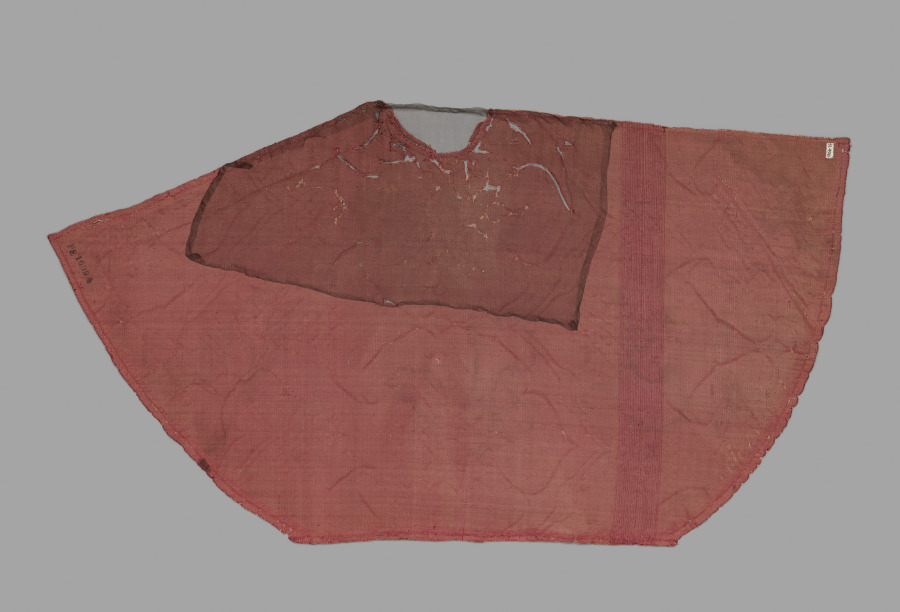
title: Pieces from Disassembled Cape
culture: Italy, 15th century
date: 1400s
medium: velvet (cut and voided); silk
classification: Velvet